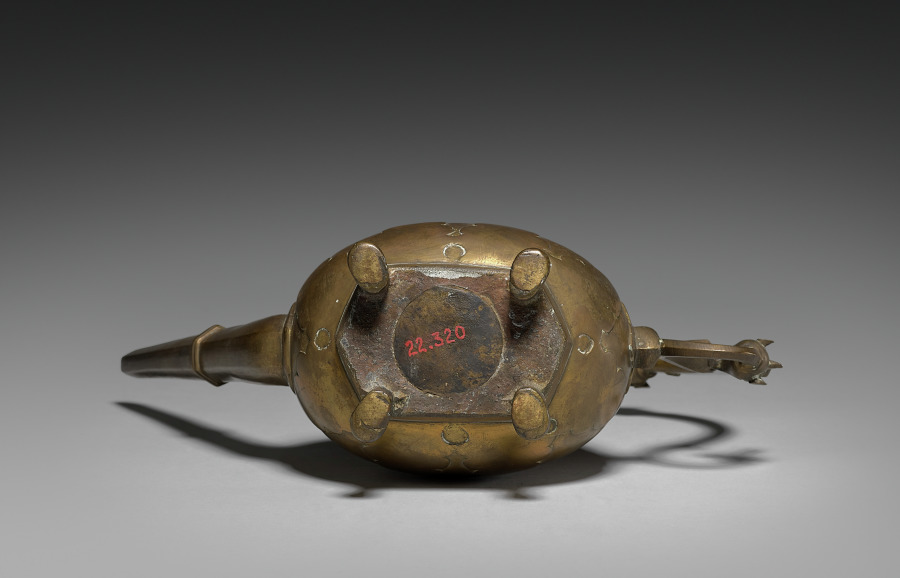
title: Vessel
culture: India, Benares, 19th century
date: 1800s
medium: brass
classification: Metalwork